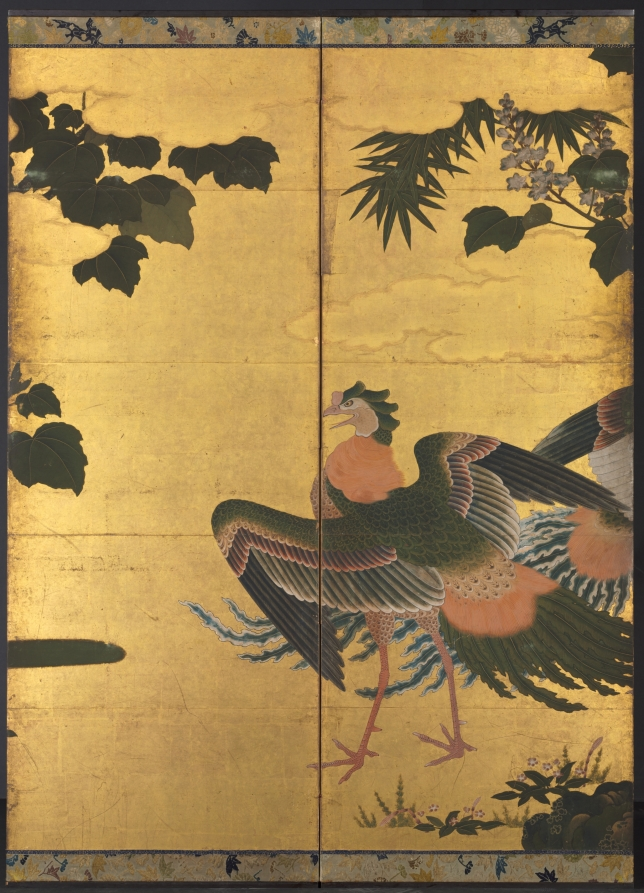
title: Phoenixes and Paulownia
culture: Japan, Momoyama period (1573–1615)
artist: attributed to Tosa Mitsuyoshi (Japanese, 1539–1613)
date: late 1500s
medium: One of a pair of six-panel screens; ink, color, and gold on gilded paper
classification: Painting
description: The immense heraldic birds on display in these byøbu reflect the Momoyama era's spirit of newly gained self-confidence and an affinity for grand expressive statements in painting, architecture, the textile and ceramic arts, as well as garden design. While that period preceded the arrival of prosperity, it clearly marked an extra---ordinary moment in Japanese cultural history, one frequently compared with the twelfth century of the Heian period. Through the extensive use of gold-foil backgrounds rather than the somber palette of carefully orchestrated ink tones evident in Muromachi byøbu, patrons colla-borated with artists as well as craftsmen in fostering a decidedly new look in much of Japanese painting. Here for instance there is no imaginary vista suggesting China's vast waterways and mountain ranges. The setting is composed instead of highly stylized lozenges of mineral green paint, suggesting the earth from which clumps of grass, flowering plants, and towering bamboo and paulownia trees emerge. Clusters of lumpy, blue-green rocks dotted with lichen provide stabilizing three-dimensional foils for these islands of vegetation as well as the all-encompassing flat, golden surface. The glorious artificiality of the setting precisely serves the artist's effort to compose a credible yet other-worldly vista for depicting the legendary phoenix gazing across the landscape at the pair of peacocks. Rather than an emblem of immortality, as it is in Western lore, in Japan the phoenix evolved out of its origins in Chinese mythology to become, by the sixteenth century, an auspicious symbol of political authority. Together with clusters of the distinctively shaped paulownia leaves, this long-tailed, mythical bird graced lacquerware as well as mural paintings, proclaiming an air of graceful com-mand. A characteristic infusion of temporality has been included also, through a seasonal flowering schema extending from spring to early summer (right) to fall and the advent of winter (left). Although traditionally attributed to the Tosa school master Tosa Mitsuyoshi (1539-1613), these byøbu possess neither seals nor signatures to confirm that authorship. Known for his jewel-like, modest-sized album paintings of courtly narratives such as The Tale of Genji, it is likely both studio training and contemporary fashions in patronage conspired to produce a good number of such byøbu. This example from the Momoyama era represents one such effort from a masterful Tosa painter, too little seen in Western collections.